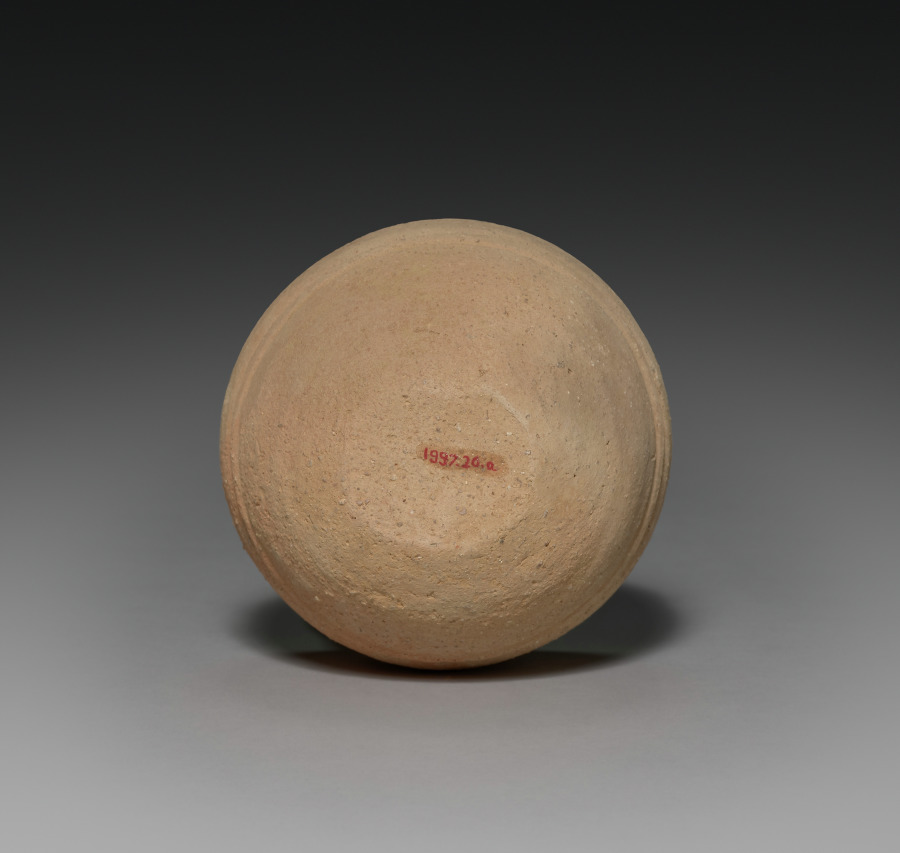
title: Lidded Jar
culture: Korea, Silla (57 BC-935) or Kaya (AD 42-562) period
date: 400s–500s CE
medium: red earthenware with incised band designs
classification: Ceramic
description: Early earthenware from the Three Kingdoms period (57 BCE–668) became widely utilized as agriculture and religion grew to be essential elements in sustaining society and its systems. The clay jars of different sizes and shapes on display were made for the following purposes: some were used to store harvested grains and seeds, some, especially lidded ones such as this, to preserve cremated remains, and some to serve offerings in rituals.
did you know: Closed kilns built on hillsides became widely used for producing this type of pottery vessel in Korea during the Three Kingdoms period.